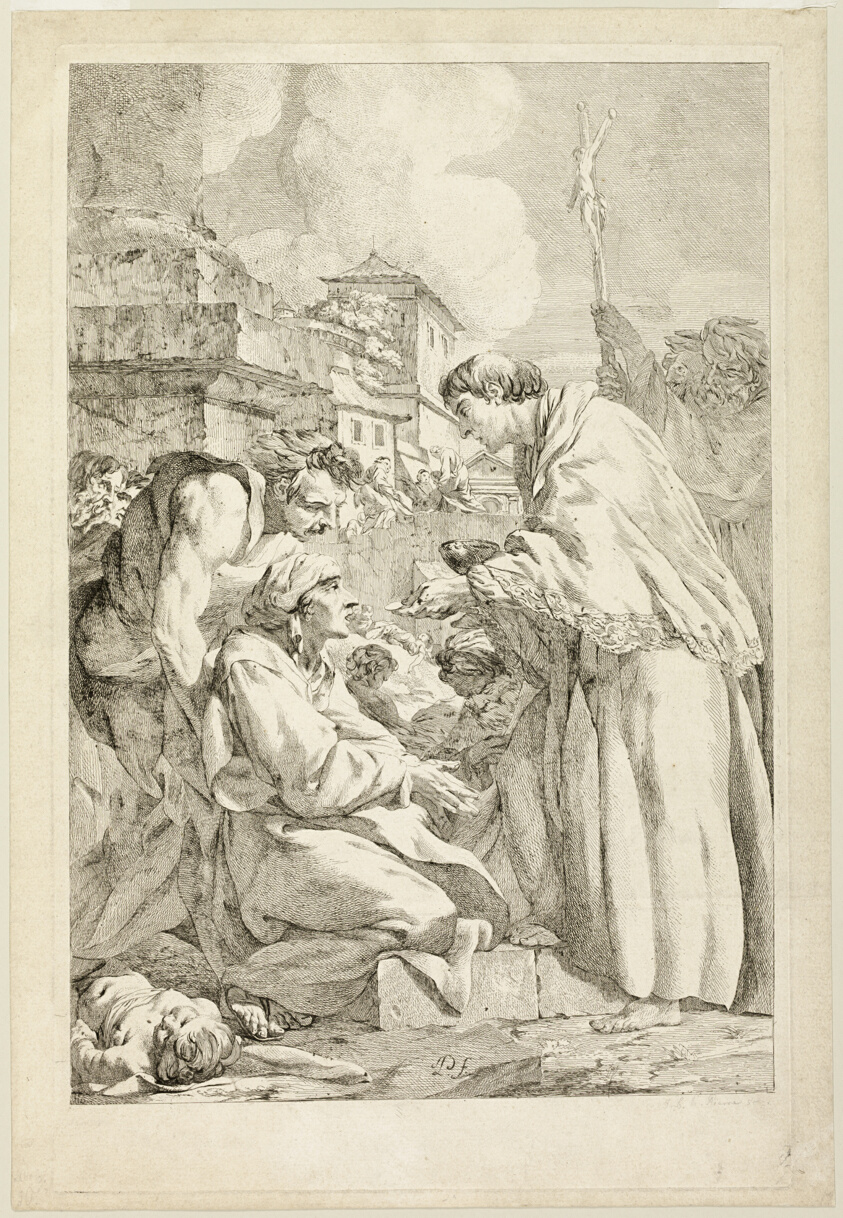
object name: Print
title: Saint Charles Borromeo Blessing the Plague-Stricken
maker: Jean Baptiste Marie Pierre (French, 1713-1789)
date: c. 1760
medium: Etching in black on off-white laid paper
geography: France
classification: etching; paper; print; prints and drawing